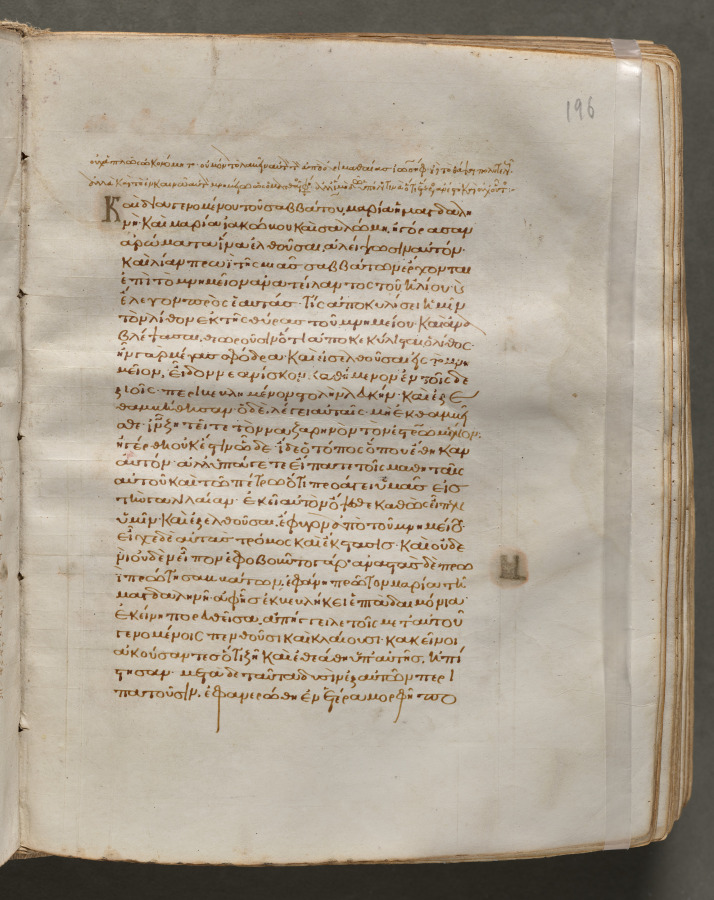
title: Text, folio 196 (recto), from a Gospel Book with Commentaries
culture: Byzantium, Constantinople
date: c. 1000–1100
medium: ink, tempera, and gold on vellum; leather binding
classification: Bound Volume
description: Each of the four gospels in this book opens on a page with brilliantly illuminated borders depicting the author of the text as well as birds-principally peacocks, symbols of the immortality of the soul-and fountains, representing the fountain of life and the salvation of the soul. This volume consists of 428 leaves with texts in Greek. Its level of sophistication suggests that it was probably written and decorated in a monastery in Constantinople.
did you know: Gospel Books were carried in procession through Byzantine churches.